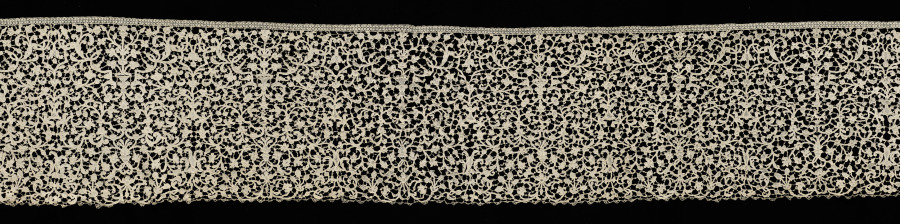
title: Lace Flounce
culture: Italy, Venice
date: 1660–99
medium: Needle lace (Venetian Rose Point-Punto Rosallino)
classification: Lace